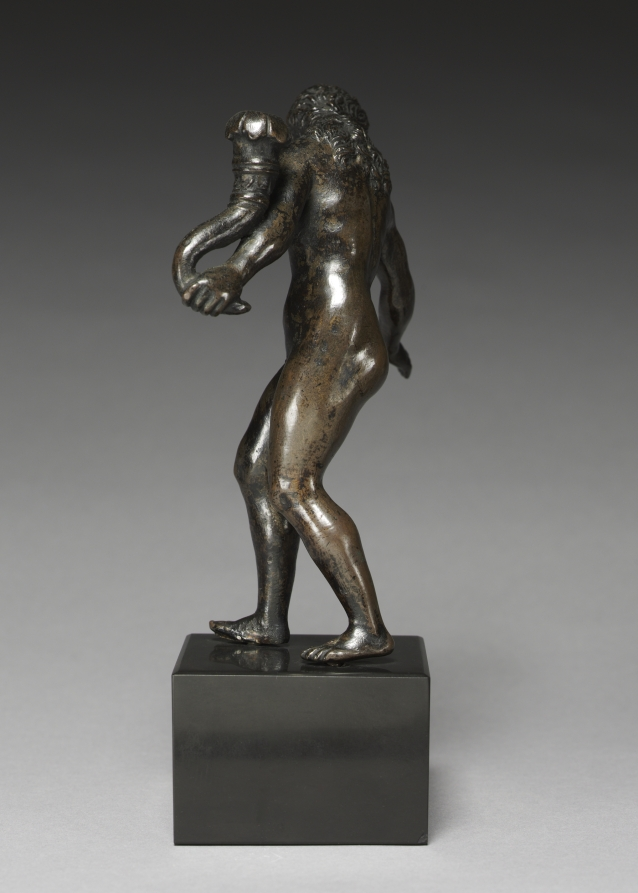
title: Woman with a Cornucopia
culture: Italy, 16th century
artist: Severo da Ravenna (Italian, c.1496–c.1543)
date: c. 1525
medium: bronze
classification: Sculpture